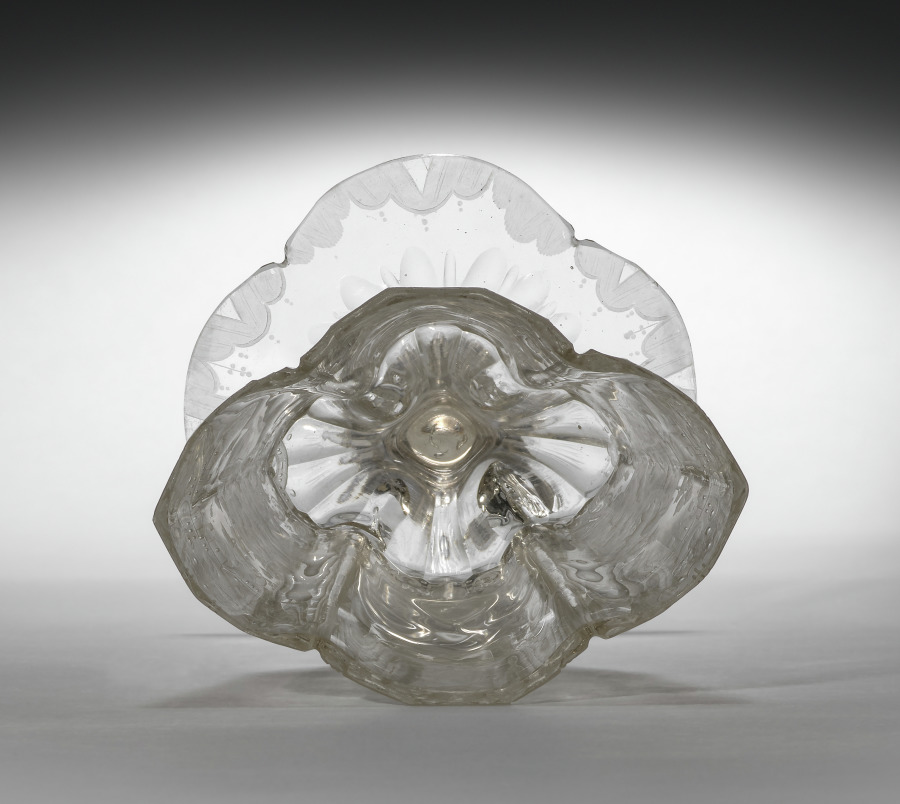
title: Standing Cup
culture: Germany, Silesia, 18th century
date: c. 1725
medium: glass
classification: Glass